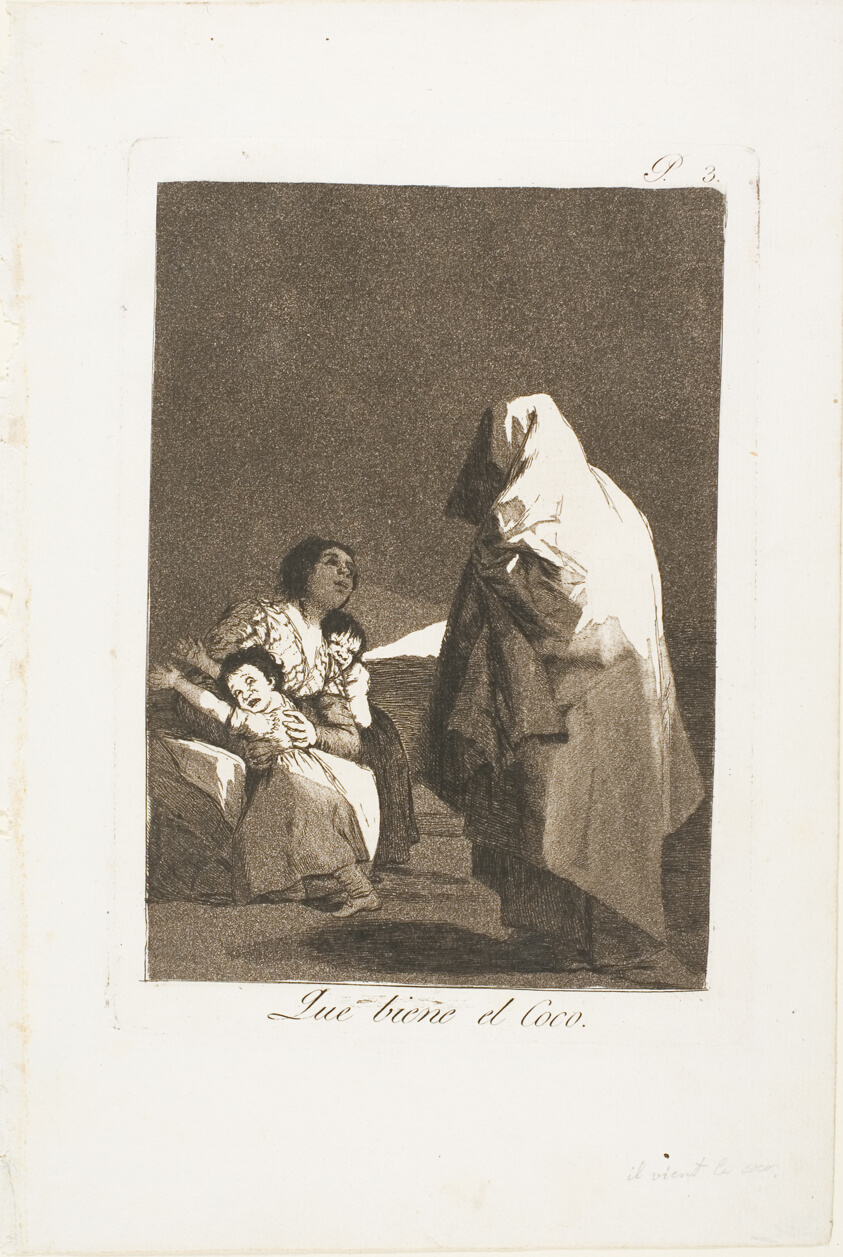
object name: Print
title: Here Comes the Bogeyman, plate three from Los Caprichos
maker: Francisco José de Goya y Lucientes (Spanish, 1746-1828)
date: 1797/99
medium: Etching and aquatint on ivory laid paper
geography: Spain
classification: etching; print; prints and drawing